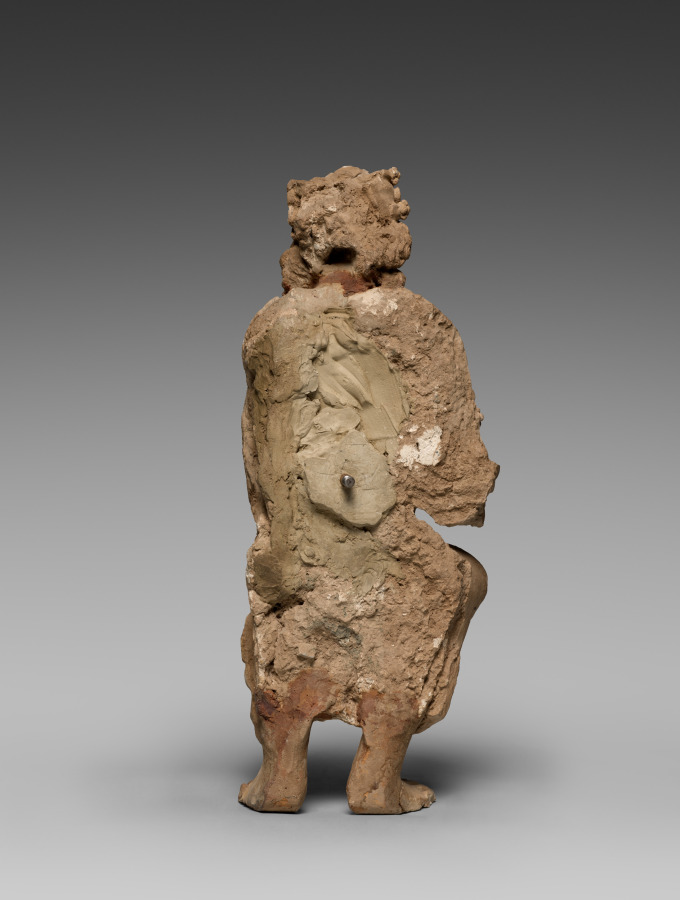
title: Adoring Attendant from a Buddhist Shrine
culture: Afghanistan, Gandhara, Kushan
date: c. 300s–400s CE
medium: stucco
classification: Sculpture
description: The medium of stucco became popular after the 4th century for works made for Buddhist sanctuaries, especially in the desert regions of Afghanistan where stone was less available. The more malleable material allowed sculptors to create sensitive and supplely modeled forms. The stucco sculptures were covered with a thin coat of lime-based whitewash, then painted; traces of original red pigment remain in some areas.